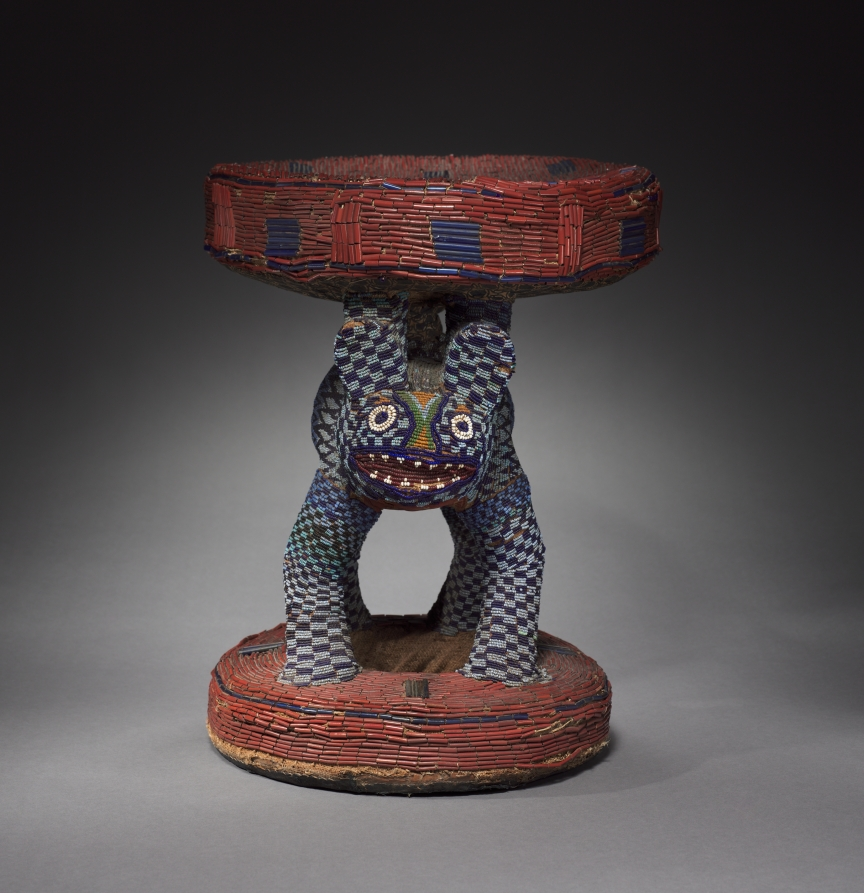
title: Prestige stool (Kuo fo)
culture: Africa, Central Africa, Cameroon, Bandjoun Kingdom, Bamileke makers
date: possibly 1800s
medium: Wood, cotton, plant fiber, glass beads, and indigo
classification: Furniture and woodwork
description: Bead-covered wooden stools and thrones are one of the most prevalent art forms among the various kingdoms and chiefdoms in the Cameroon Grassfields region. This example, once part of the royal treasury, belongs in the category of "travel stools," usually used in conjunction with more private, minor ceremonies and rituals at the palace. The leopard imagery confirms the object’s royal status. It alludes to the belief that the king could temporarily transform himself into this feared predator.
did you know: The beads on this stool were sewn on by hand. Look underneath the stool, however, and you can see commercially made printed fabric.